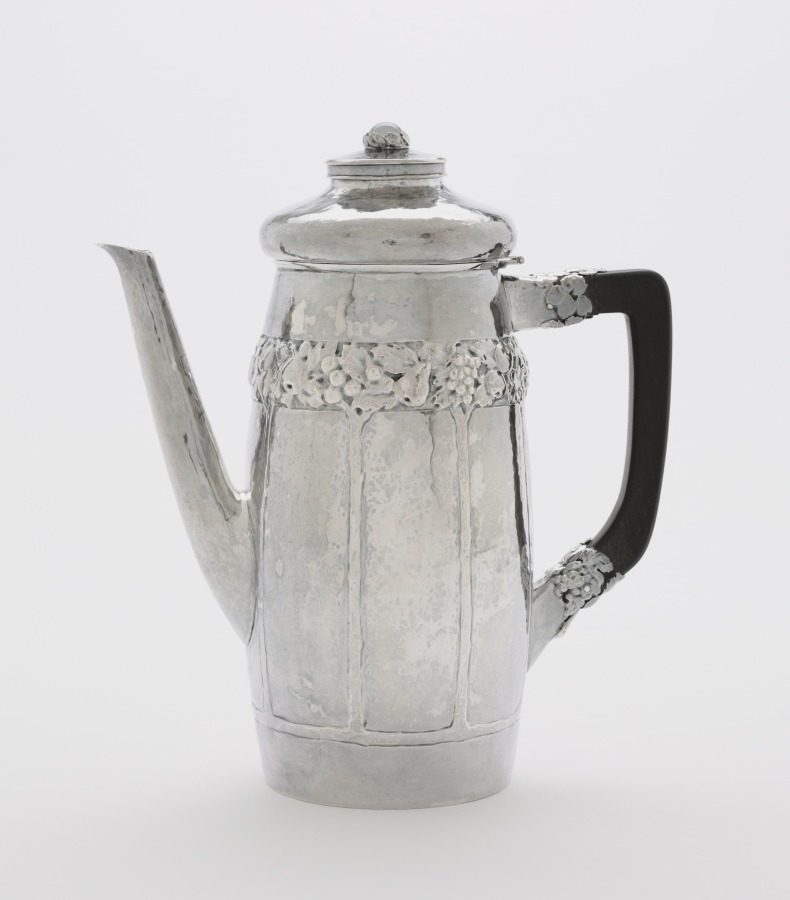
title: Coffee Pot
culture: America, Ohio, Cleveland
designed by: Louis Rorimer (American, 1872–1939)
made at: and Rokesley Shop (American)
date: c. 1910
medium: silver, moonstones, ebony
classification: Silver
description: This tea and coffee service was designed for production by the Rokesley Shop, a collaborative group working at Louis Rorimer’s studio. Reacting against industrial mass production, Rorimer emphasized inventive design in finely crafted objects.